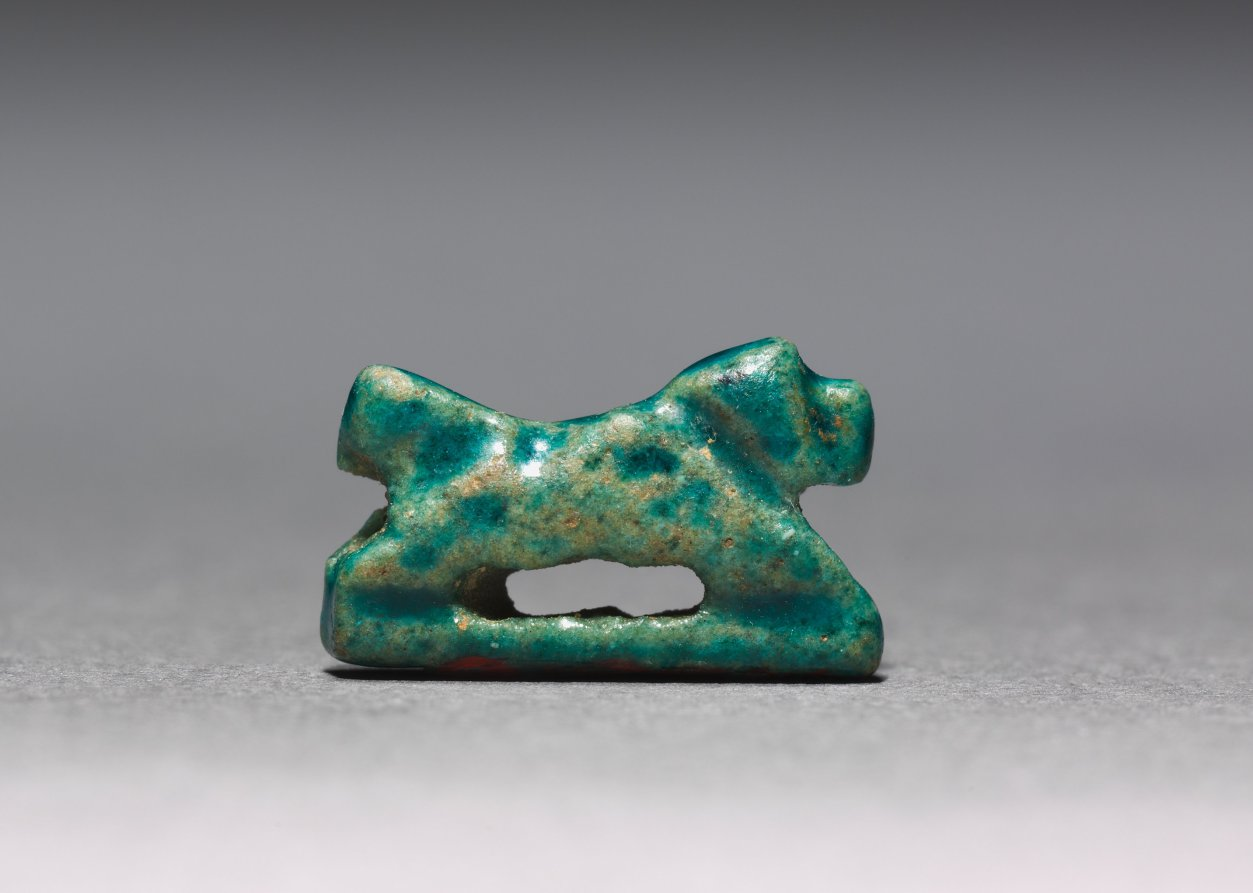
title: Amulet of a Dog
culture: Egypt, First Intermediate period (2123–2040 BCE)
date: 2123–2040 BCE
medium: turquoise green faience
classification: Amulets